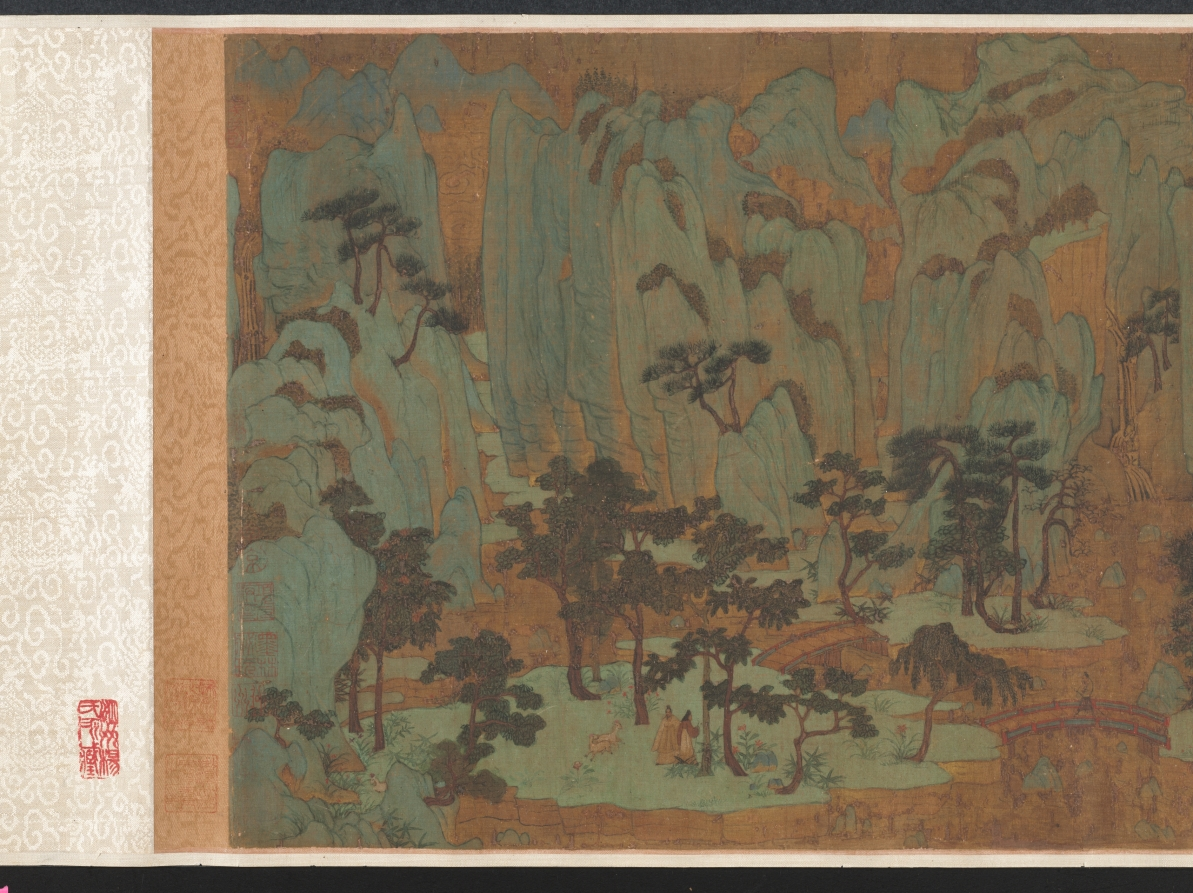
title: Mountains of the Immortals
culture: China, Yuan dynasty (1271-1368)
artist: Chen Ruyan (Chinese, c. 1331–1371)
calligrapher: Ni Zan (Chinese, 1301–1374)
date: 1300–1370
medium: Handscroll; ink and color on silk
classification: Painting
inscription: 1 inscription, 3 colophons, and 37 seals: 1 inscription, dated 1371, by Ni Zan 倪瓚 (1301-1374); 17 seals of Xiang Yuanbian 項元汴 (1525-1590); 4 seals of Chu Chih-ch'ih (late Ming Dynasty); 1 seal of Liang Qingbiao 梁淸標 (1620-1691); 1 seal of Gao Shiqi 高士奇 (1645-1704); 4 seals of Lu Xinyuan 陸心源 (1834-1894); 1 colophon, dated 1908, and 5 seals of Jing Xian 景贒; 1 colophon, dated 1915, by Lung Yu; 1 colophon, dated 1932, and 2 seals of Wu Mei; 3 seals unidentified.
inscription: 仙山圖， 陳君惟允所畫。 秀潤清遠， 深得趙榮祿筆意。 其人已矣， 今不可復得。 辛亥十二月二日倪瓚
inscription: Colophon by Jing Xian 景贒: The preceding Land of Immortals is an authentic work of the Yuan master, Chen Weiyun 陳惟允. According to the Yu yi bian 寓意編 by Du Mu 都穆of the Ming Dynasty, the painting was seen at the home of Chen Mengxian 陳孟賢 [c. 1500], a hermit. It is also recorded in Yu yi lu 寓意錄 of the present [Qing] era. The dimensions and the seals are all correct. When the painting went into the possession of Liang Qingbiao 梁淸標, the silk was already quite dilapidated. The only thing now missing, however, is the one line of writing by Xiang Zijing 項子京 [Xiang Yuanbian 項元汴] who records the original price he paid, being fifteen taels of silver. This must have been cut off by the dealer, which nevertheless did no harm to a masterpiece such as this. Jing Xian recorded this in the second month of the maoshen year [1908].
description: The landscape in deep green tones offers a view into a secluded mountain valley, populated by ancient figures surrounded by deer and cranes, all under high pine trees. A red-robed immortal in the air steers his crane toward the paradise land. This idyllic scene was presumably created amid the tumultuous transition from the Yuan to the Ming dynasty. Chen from Suzhou supported major rebel leaders, first Zhang Shicheng (1321–1367) with his base in Suzhou and then his rival Zhu Yuanzhang in Nanjing, after the latter had established the Ming dynasty. Chen was executed in 1371.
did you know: Such blue and green landscapes often evoke nostalgia for the idealized ancient times.